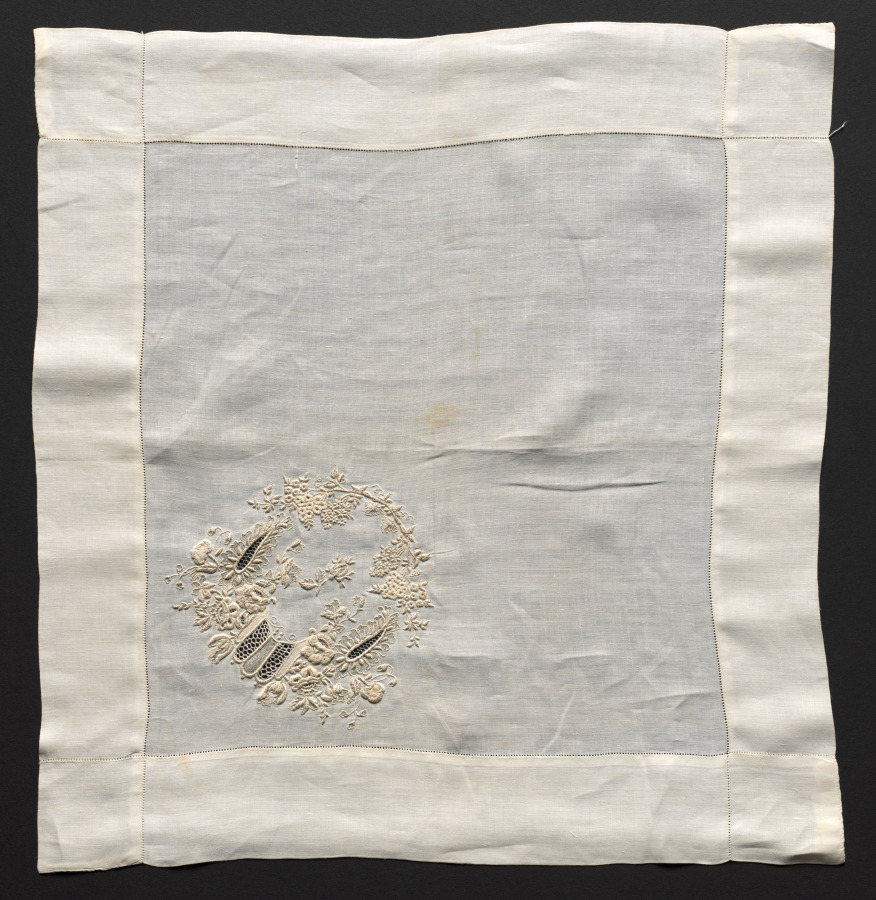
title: Embroidered Handkerchief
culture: Spain, Teneriffe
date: 1800s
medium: Plain weave linen: embroidered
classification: Embroidery